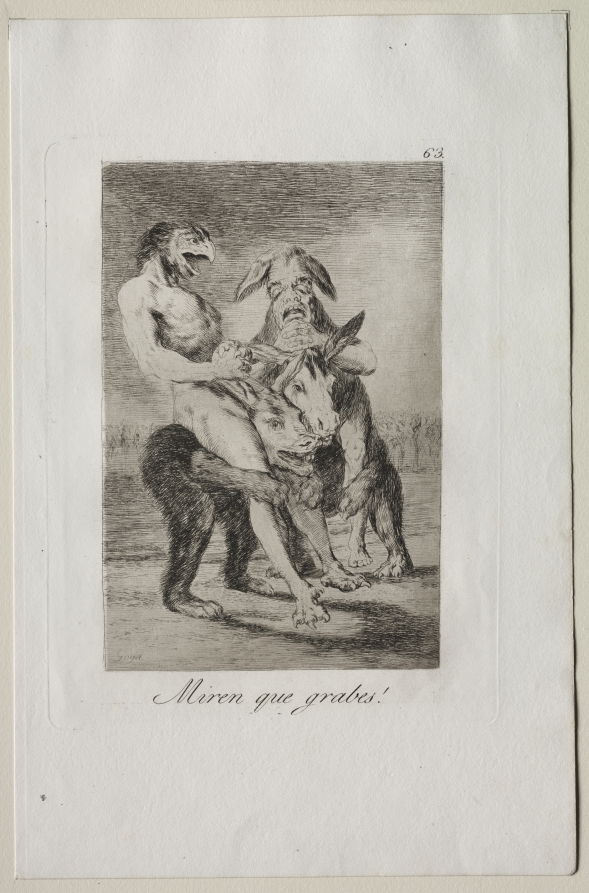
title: Look How Solemn They Are!, Plate 63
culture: Spain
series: Los Caprichos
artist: Francisco de Goya (Spanish, 1746–1828)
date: 1799, printed c. 1855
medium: etching and aquatint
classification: Print